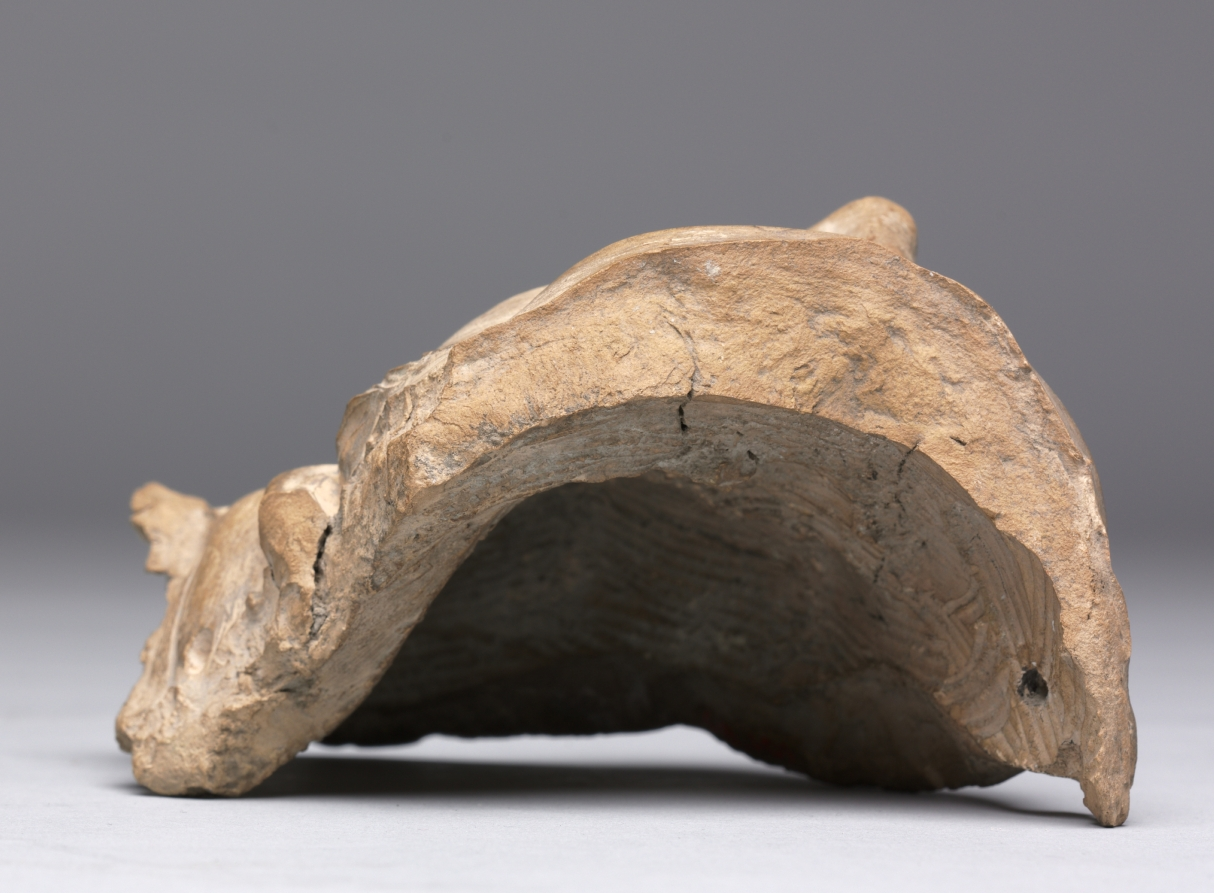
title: Head of Proserpina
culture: Italy, 17th century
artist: after Gian Lorenzo Bernini (Italian, 1598–1680)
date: 1650– 1700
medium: terracotta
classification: Sculpture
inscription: penciled inscription on neck: "Palazzo Bernini / 1839"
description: This work was long thought to be a fragment of a preliminary study for a large-scale marble sculpture by Gian Lorenzo Bernini in Rome depicting Pluto, the god of the underworld, dragging Proserpina away to be his wife. Bernini’s finished studies never had the scrape marks visible on the cheek, indicating another sculptor’s hand. The work was owned by Bernini’s family, and his many studio assistants often copied his work. This terracotta therefore may be by one of the more significant sculptors of this group. The subject conveys fleeting expressions of sadness, fear, and surprise, and would have interested sculptors learning to convey complex emotions.